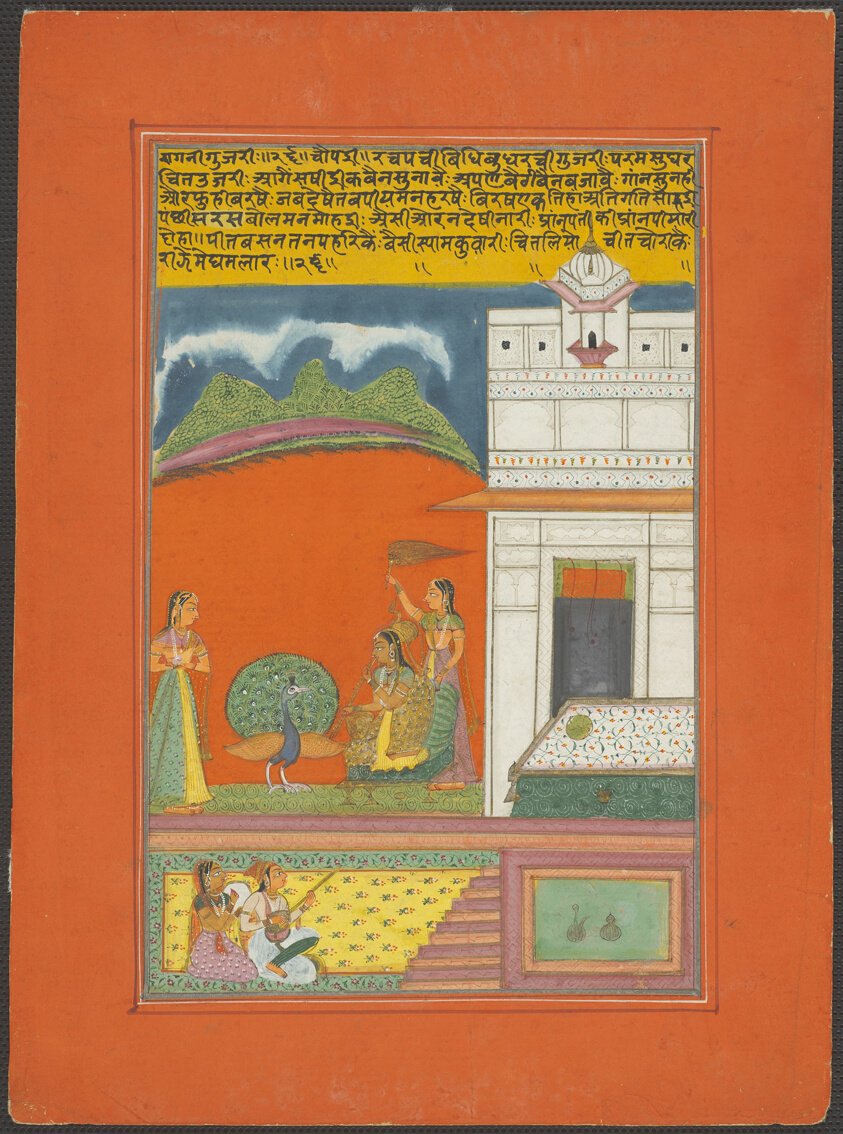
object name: Painting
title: Ragini Gujari, Page from a Jaipur Ragamala Set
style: South Asian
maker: India; Rajasthan, Jaipur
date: c. 1750-1770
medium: Opaque watercolor and gold on paper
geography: Rajasthan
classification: miniature painting; painting; asian art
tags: music, musicians